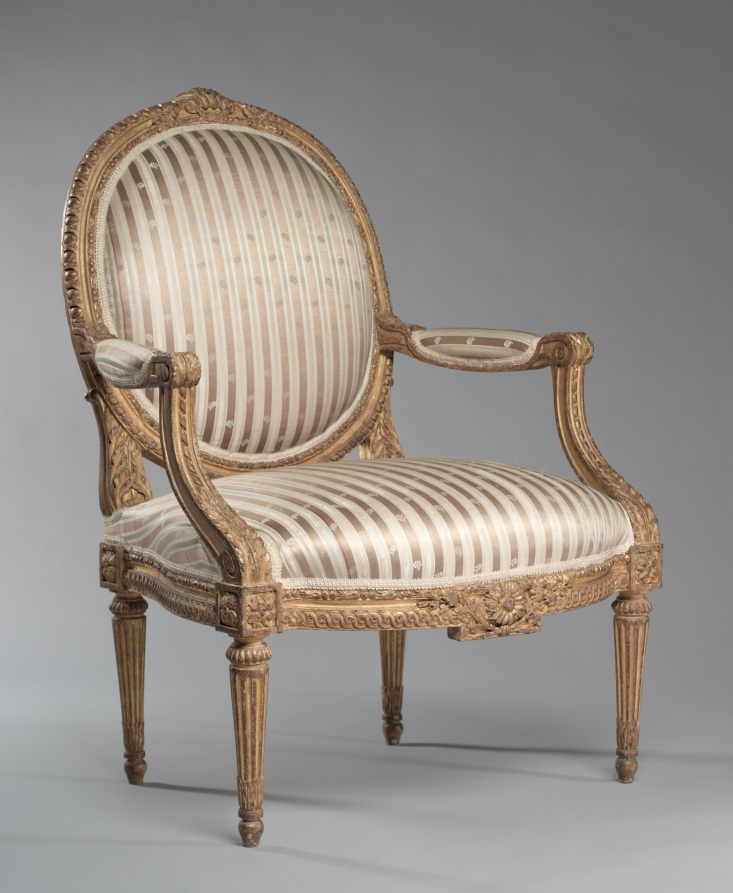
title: Armchair (Fauteuil) (1 of 2)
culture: France, 18th century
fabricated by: Jean-Baptiste II Tilliard (French, 1797)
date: c. 1765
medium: carved and gilded wood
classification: Furniture and woodwork